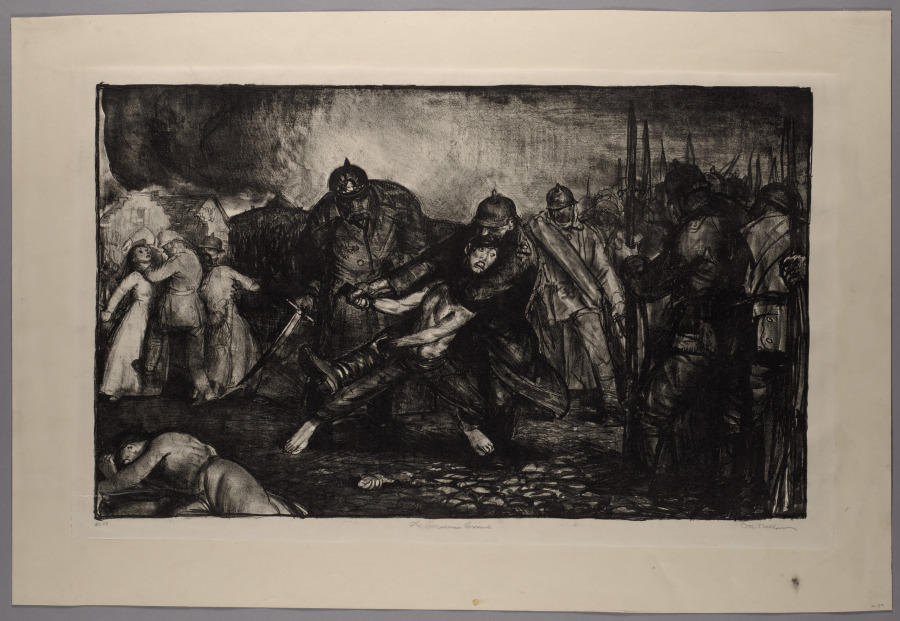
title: War Series: The Germans Arrive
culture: America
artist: George Bellows (American, 1882–1925)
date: 1918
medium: lithograph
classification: Print